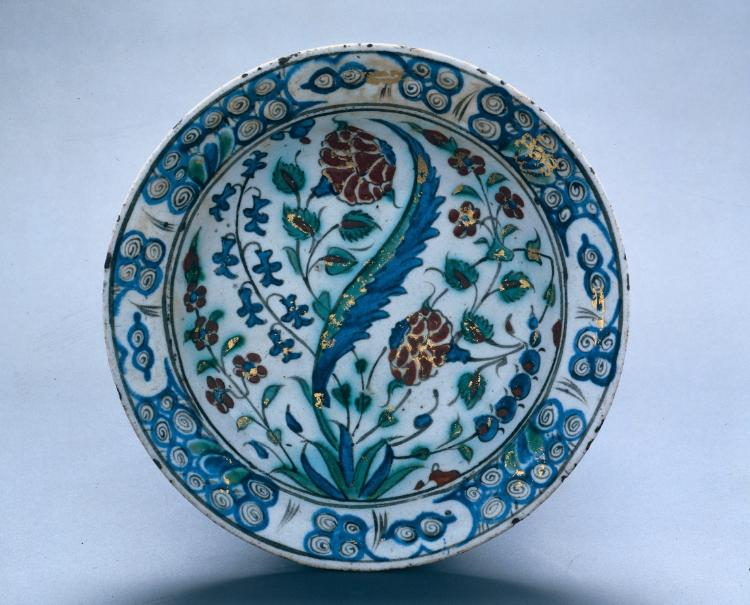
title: Gilded Dish with Flowers and Leaves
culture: Turkey, Iznik, Ottoman period (1299–1922)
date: c. 1590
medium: Fritware with red slip, underglaze design, and overglaze gilding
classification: Ceramic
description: This floral design highlights the rich red, the most difficult to achieve in ceramics, that was developed by Turkish potters. The design is divided with a central swaying saz leaf, with red roses, blue hyacinths, and other floral elements enhanced with glittering gold, a feature that rarely survives. The rim displays a simplified “rock and wave” design adopted from Chinese ceramics which were abundant in the imperial Topkapi Palace in Istanbul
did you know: Turkish potters developed the red color with a clay slip rich in iron.